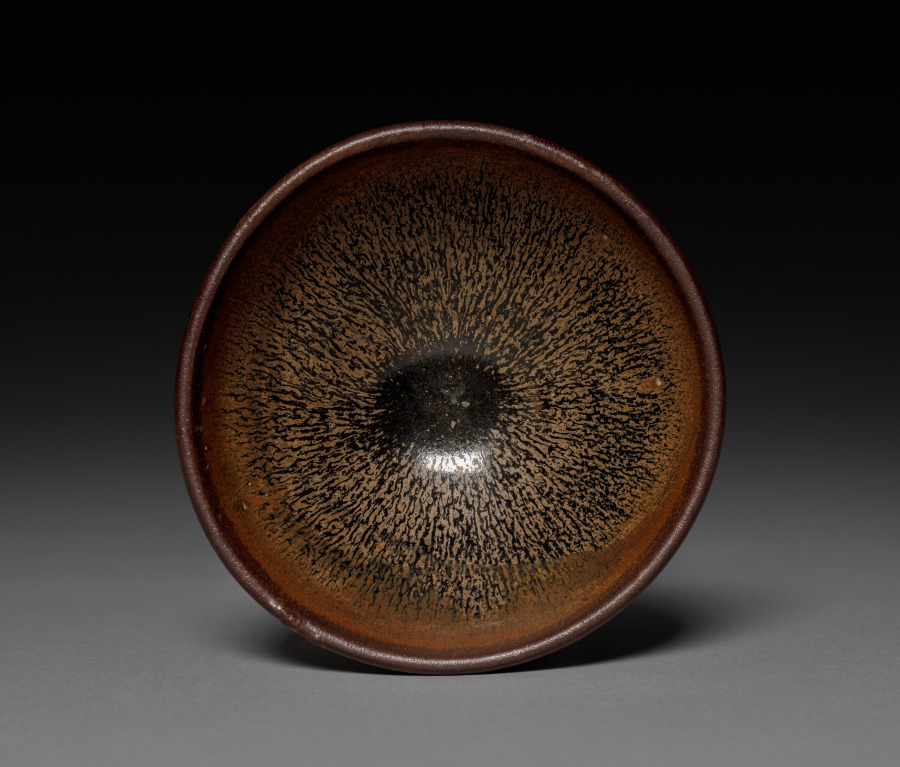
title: Tea Bowl: Jian ware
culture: China, near Shui ch'i, Song dynasty (960-1279)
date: 960–1279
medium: purplish brown stoneware with iron slip glaze coating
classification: Ceramic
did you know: Jian ware was very popular with the tea cultures in China and Japan.